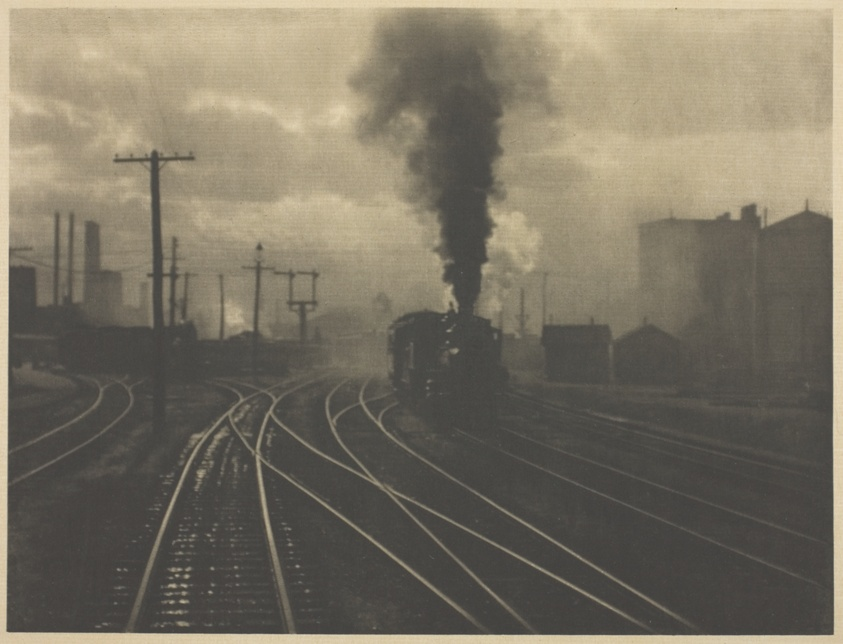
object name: Photograph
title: The Hand of Man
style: Pictorialism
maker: Alfred Stieglitz (American, 1864–1946)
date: 1902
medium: Photogravure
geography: United States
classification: photogravure; photomechanical process; photography; photograph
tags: cityscapes